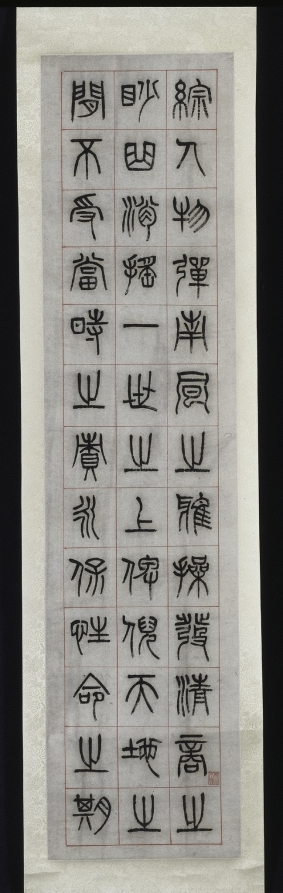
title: On Happiness, Calligraphy in Seal Script Style (zhuanshu)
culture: China, Changsu, Qing dynasty (1644-1911)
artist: Yang Yisun (Chinese, 1813–1881)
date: 1871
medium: hanging scroll, ink on paper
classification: Painting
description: Yang Yisun transcribed this ancient text on six narrow scrolls, starting at the top right and ending at the bottom left. Yang emphasizes the text’s historic nature by using the seal script style found on stone steles and bronze vessels. On Happiness features reflections of a scholar on a leisurely life in the countryside, composed by Han dynasty official Zhongchang Tong, who died the year the Han dynasty collapsed (AD 220). The idyllic life described in the text may bean evocation of the past in a time of national crisis. A decade before Yang wrote these scrolls, Anglo-French forces had looted and burned the Summer Palace in Beijing. At the same time, the domestic Taiping rebellion (1850–64), led by a religious fanatic to overthrow the Qing government, had devastated Yang’s homeland, the Jiangnan region, with an estimated 20 million lives lost.